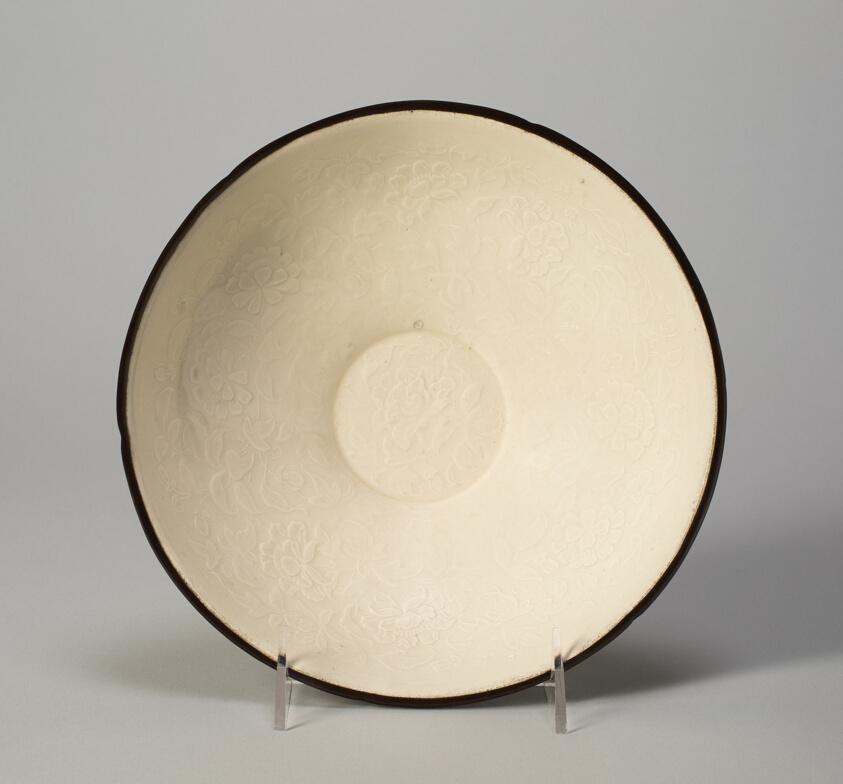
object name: Vessel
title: Bowl with Boys Playing amid Peony Flowers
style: Chinese (culture or style)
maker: China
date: Jin dynasty (1115–1234), 12th century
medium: Ding ware; porcelain with underglaze mold-impressed decoration; metal rim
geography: China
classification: bowl; porcelain; dish (vessel); ceramics; asian art; vessel